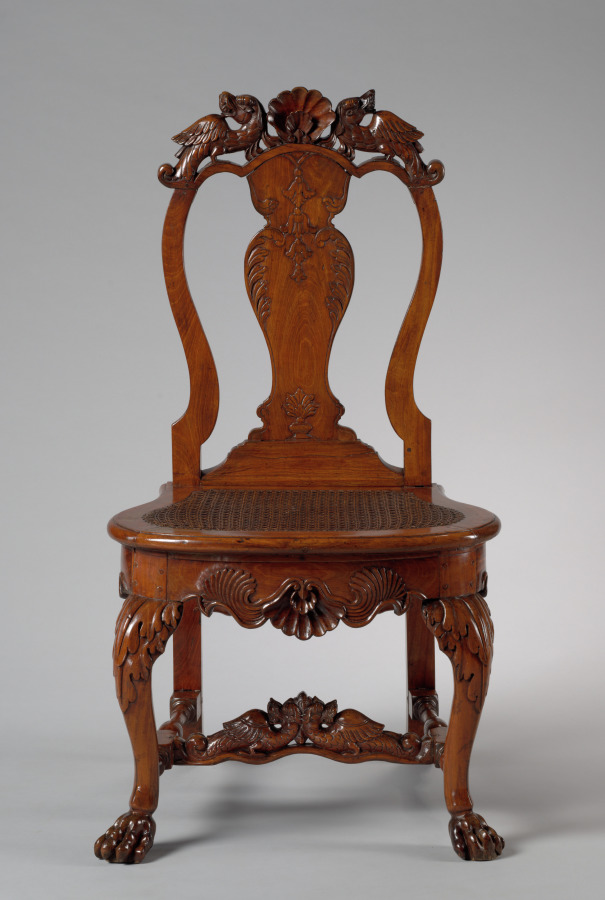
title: Side Chair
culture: Netherlands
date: 1705–15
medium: tulipwood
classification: Furniture and woodwork